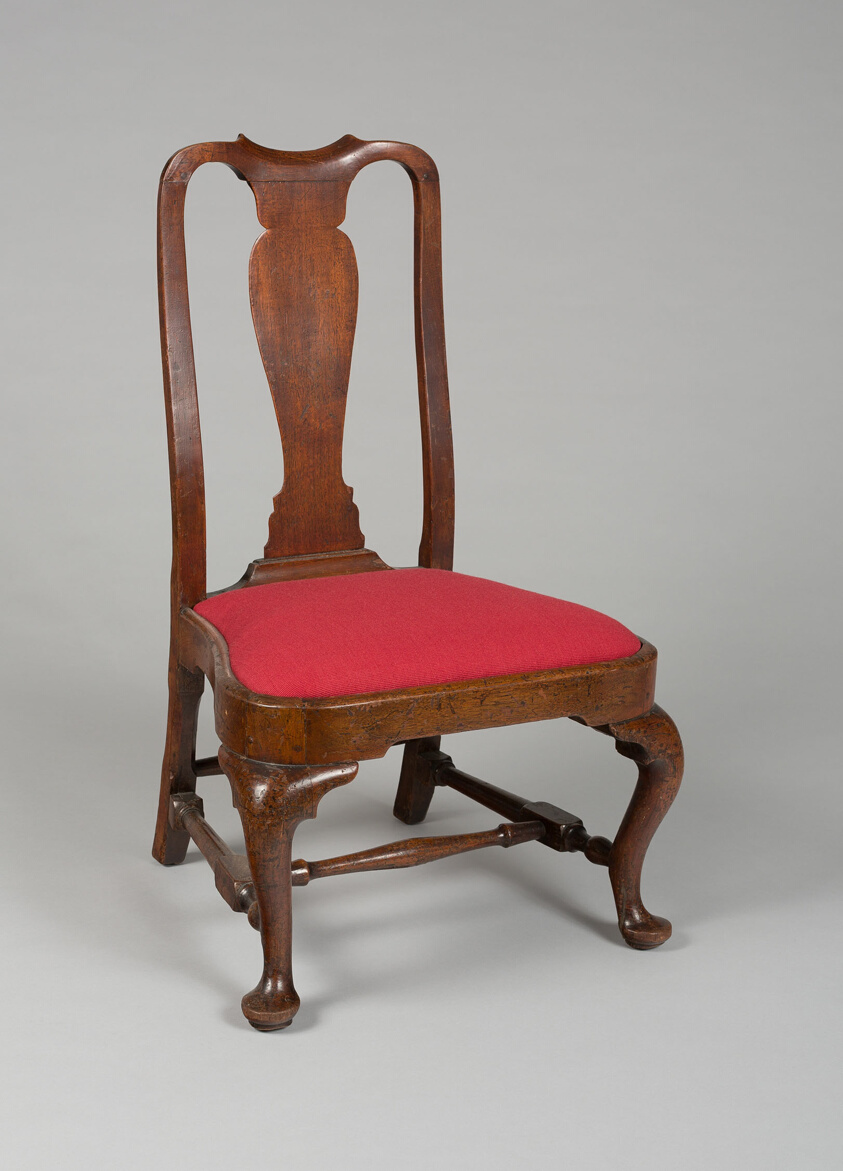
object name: Furniture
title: Child's Side Chair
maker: Artist unknown (American, 18th century); Rhode Island or Massachusetts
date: 1730–60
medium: Walnut with maple and upholstery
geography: Rhode Island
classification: seating; furniture; american decorative arts; american arts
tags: furniture